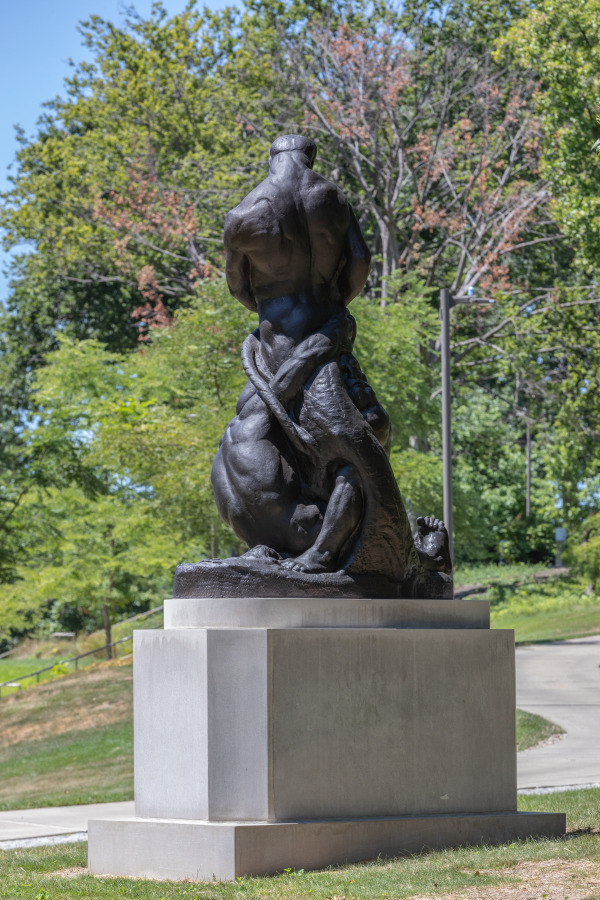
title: The City Fettering Nature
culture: America, Ohio, Cleveland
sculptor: Alexander Blazys (American, born Russian Empire [now Lithuania], 1894–1963)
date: 1927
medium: bronze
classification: Sculpture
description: Alexander Blazys, a Lithuanian immigrant, became a leading sculptor in Cleveland during the 1920s, when he created The City Fettering Nature for the Cleveland Museum of Art’s grounds. In this composition, Utility and Beauty, two characteristics of the city, are shown as intertwined figures attempting to subdue Nature’s power. The brawny figure of Nature, still standing despite this attack, struggles to free himself from the restraints.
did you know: This monumental bronze sculpture weighs 1,500 pounds and requires a crane to install.